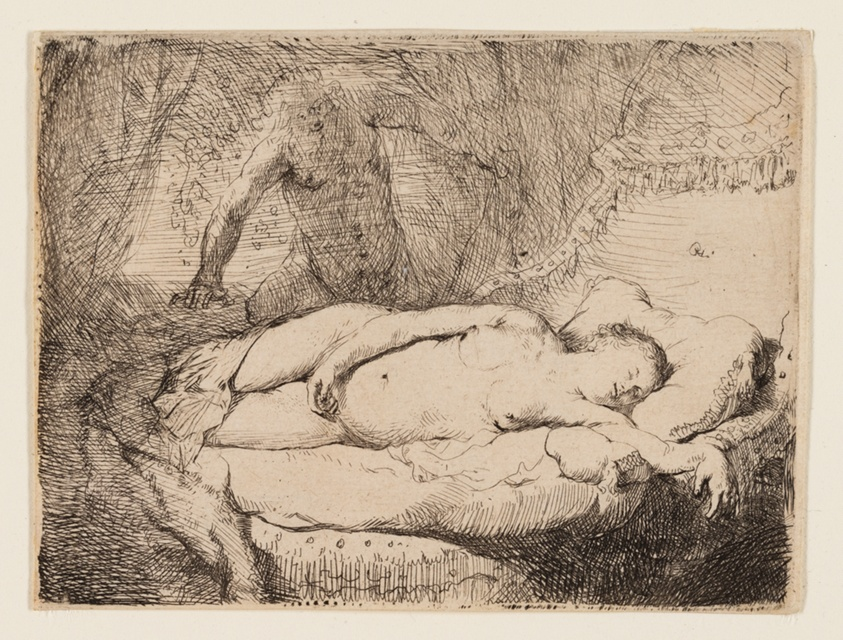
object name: Print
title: Jupiter and Antiope: Smaller Plate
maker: Rembrandt van Rijn (Dutch, 1606-1669)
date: c. 1631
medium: Etching on buff laid paper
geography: Holland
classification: etching; print; prints and drawing; paper